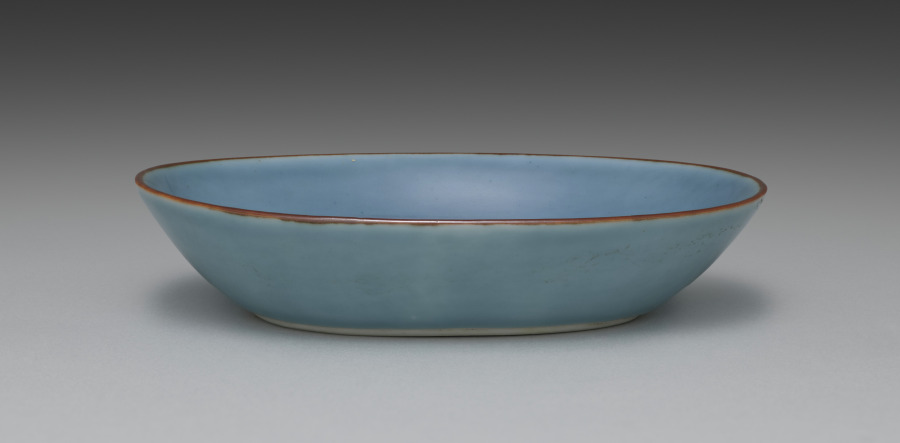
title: Dish from Dishes with Shells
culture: Japan, Taishō period (1912–26)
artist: Seifū Yohei IV (Japanese, 1872–1951)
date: 1914–46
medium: One from a set of five dishes; porcelain with blue glaze, iron oxide, and molded design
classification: Ceramic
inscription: 清風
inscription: 清風造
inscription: 清風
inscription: 成山清風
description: Yohei IV chose an aquatic theme for this set of five mukōzuke, side dishes. He added an iron oxide rim and used a concentrated blue glaze on both the interior and exterior. The glaze, named on the box lid, is his father’s “evening moon” (tsukiyoi) color. The conch in relief takes up the entire bottom of the dish. Up the sides are two snails on one end and on the other a scallop. This results in a boldly graphic, less realistic effect.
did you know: This set of dishes, mukōzuke, could be used for serving small side dishes at a tea gathering.